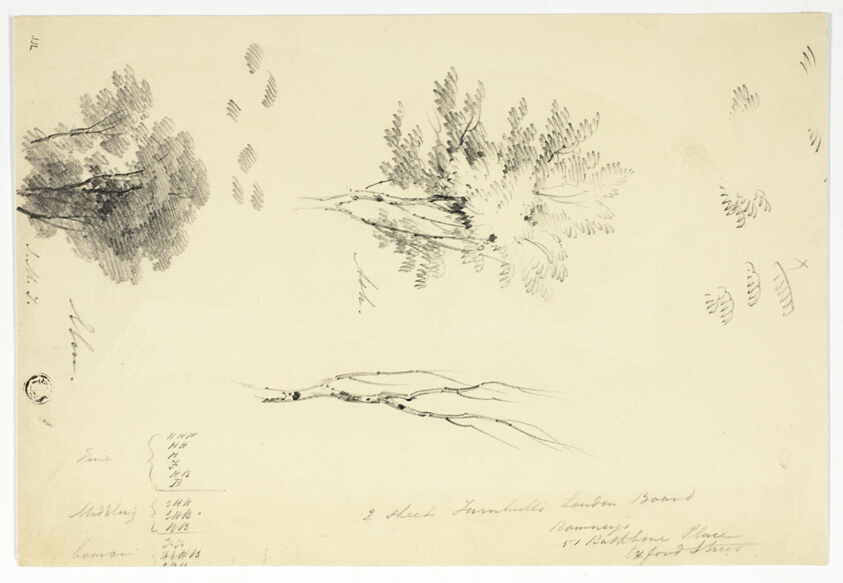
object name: Drawing and Watercolor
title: Sketches of Elm and Ash Trees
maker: Joseph Mallord William Turner; English, 1775-1851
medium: Graphite on cream wove card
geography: England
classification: graphite; drawings (visual works); prints and drawing